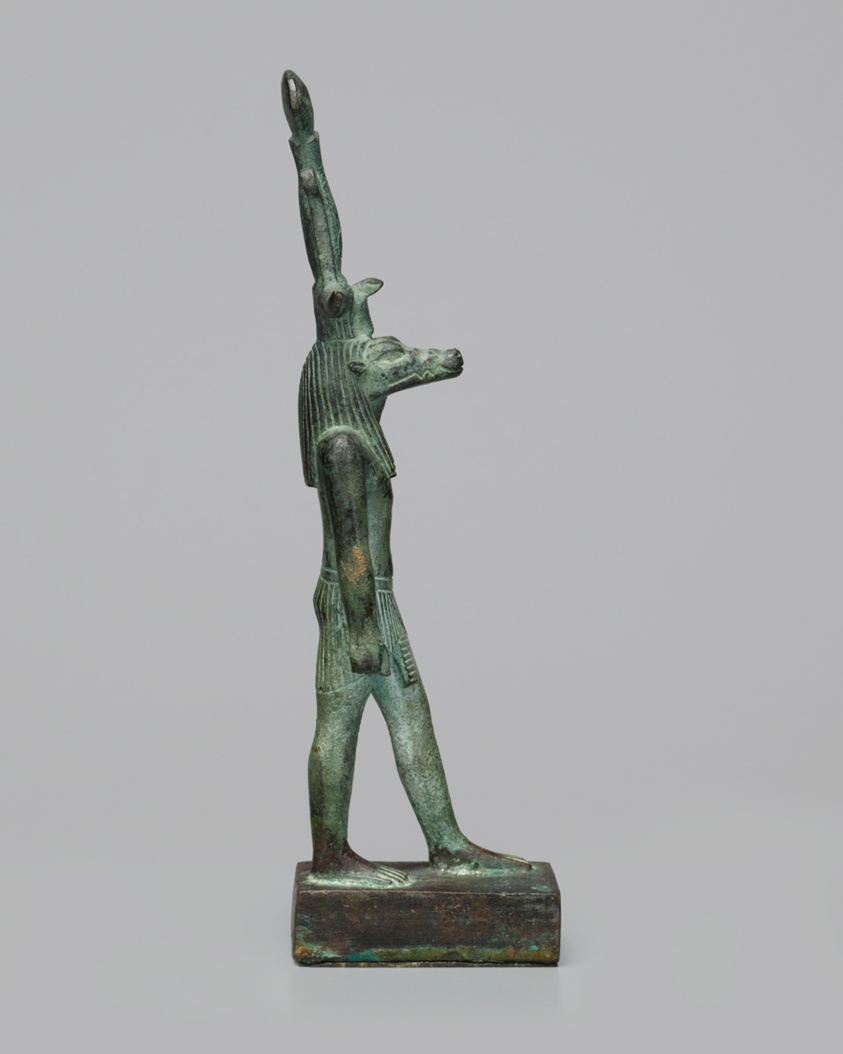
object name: Sculpture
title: Statuette of Sobek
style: late period (egyptian), ancient, egyptian, thirtieth dynasty, twenty-eighth dynasty, twenty-ninth dynasty, twenty-seventh dynasty, twenty-sixth dynasty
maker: Egyptian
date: Late Period, Dynasty 26–30, 664–332 BCE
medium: Copper alloy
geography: Egypt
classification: statuette; bronze; metal; sculpture; ancient art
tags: gods (deities), crowns, crocodiles